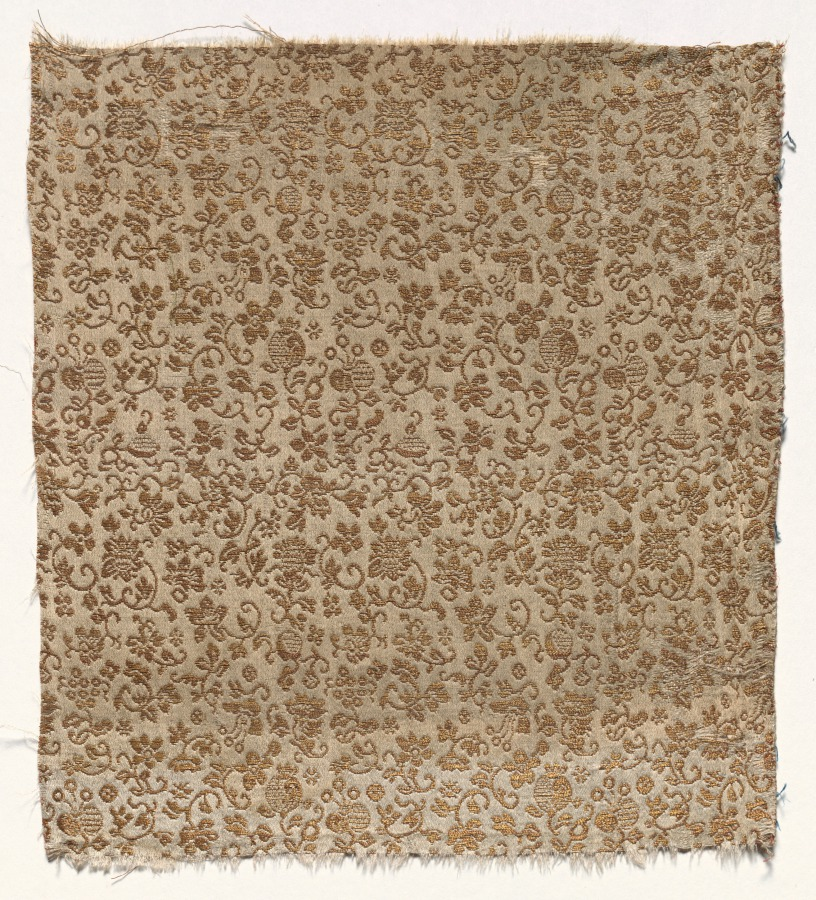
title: Textile Fragment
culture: Japan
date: 1800s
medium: silk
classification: Textile